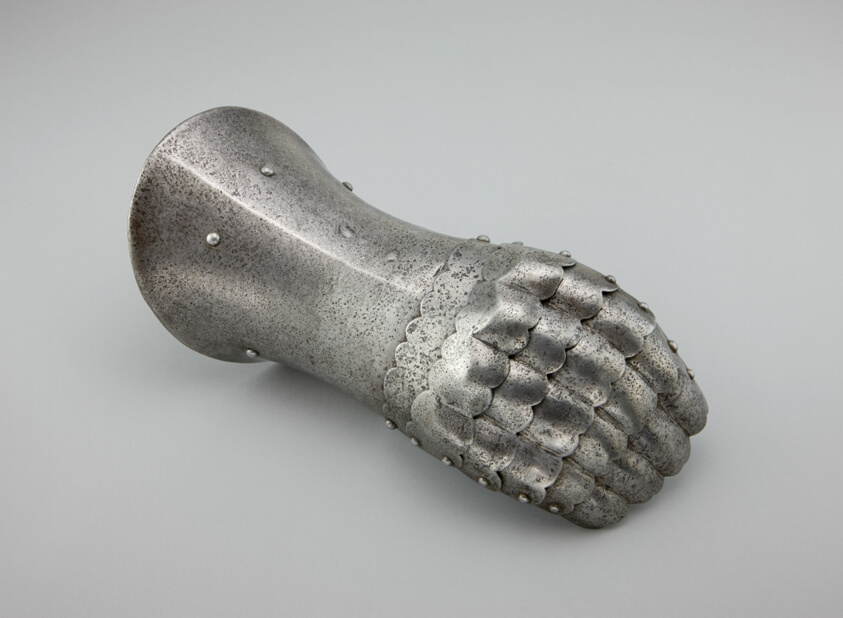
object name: Armor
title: Mitten Gauntlet for the Right Hand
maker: Spanish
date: 19th century in the early 16th century Spanish style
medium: Steel and leather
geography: Spain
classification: suit-gauntlet; armor; arms and armor